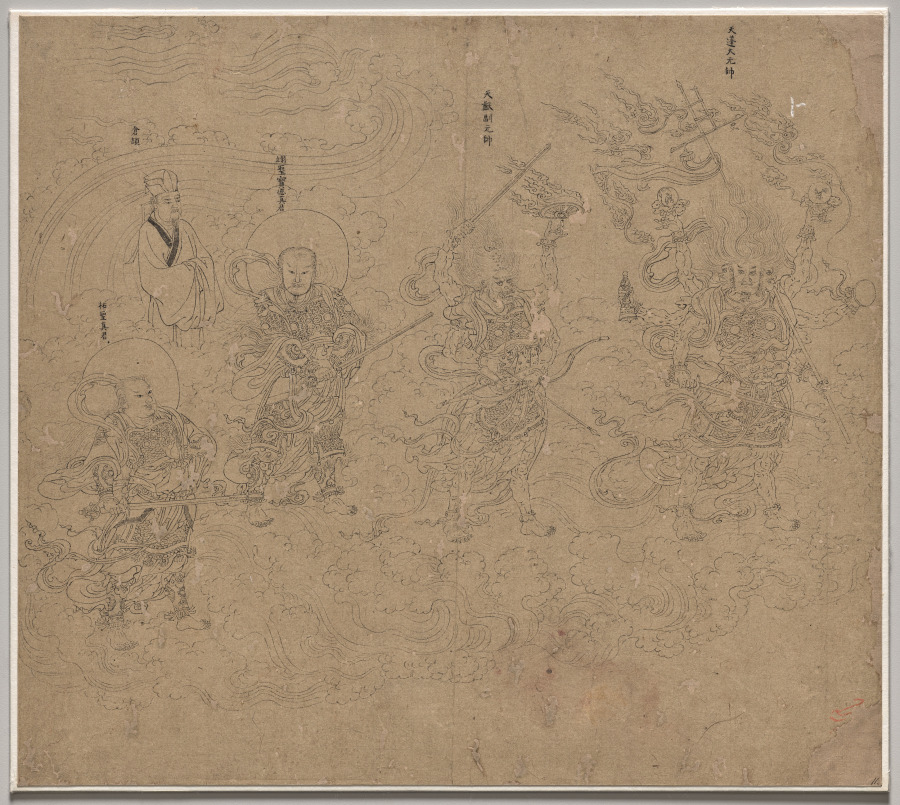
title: Album of Daoist and Buddhist Themes: Procession of Daoist Deities: Leaf 11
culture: China, Southern Song dynasty (1127-1279)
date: 1200s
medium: Album, ink on paper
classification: Painting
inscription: 天蓬大元帥; 天猷副元帥; 翊聖寶德真君; 倉頡; 祐聖真君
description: This album leaf depicts the Four Daoist Saints in martial garb from right to left: Field Marshal Tianpeng 天蓬大元帥, Vice Marshal Tianyou 天猷副元帥, True Lord Yisheng (He Who Cherishes Virtues 翊聖寶德真君), and True Lord Yousheng 祐聖真君. In addition, the painter added the figure of Cang Jie 蒼頡, the legendary inventor of written language. Marshal Tianpeng is represented in the manner of a Buddhist asura, with three faces and six arms.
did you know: Marshal Tianpeng’s top two arms hold the sun with the three-legged crow and the moon with the rabbit pounding the elixir of life.